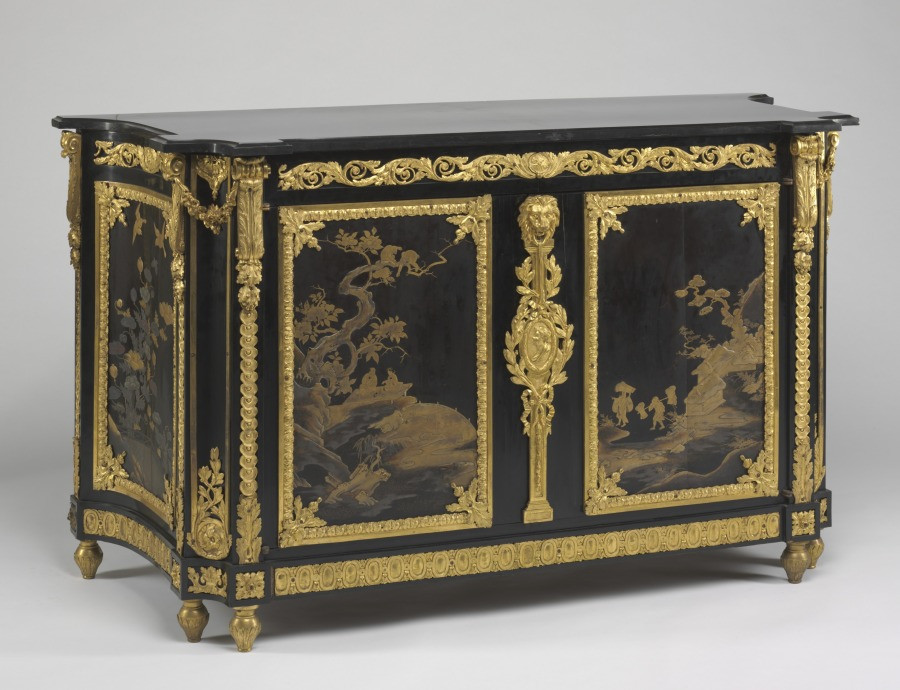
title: Chest of Drawers (Commode)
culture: France, Paris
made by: René Dubois (French, 1737–1798)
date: c. 1765– 1770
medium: ebony veneer with Japanese lacquer panels, gilt bronze mounts, and marble top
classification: Furniture and woodwork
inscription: signed on top front corners: I. Dubois.